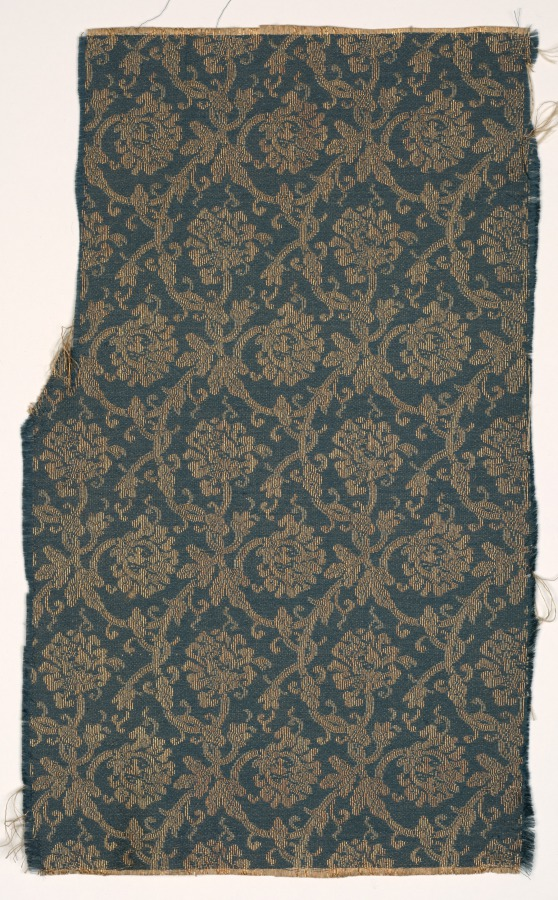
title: Textile Fragment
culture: Japan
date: 1800s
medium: silk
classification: Textile